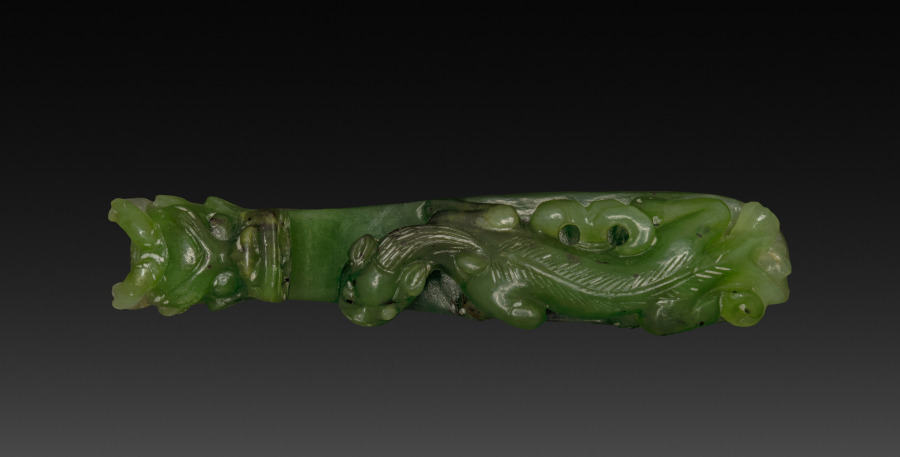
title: Buckle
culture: China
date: 1900s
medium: jade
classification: Jewelry